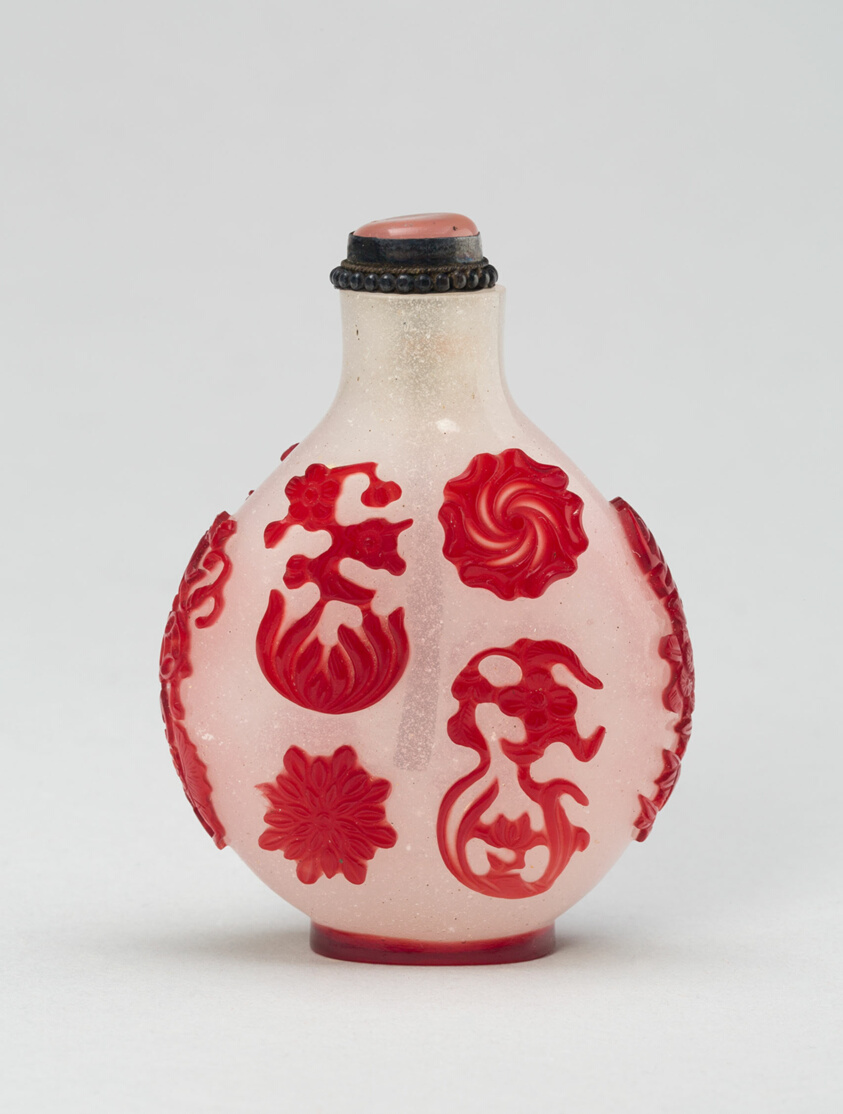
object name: Vessel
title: Snuff Bottle with Various Free-Floating Flower Heads and Fruits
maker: China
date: Qing dynasty (1644–1911), 1750–1830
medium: Glass; red overlay on snowstorm ground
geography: China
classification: snuff bottle; asian art; vessel